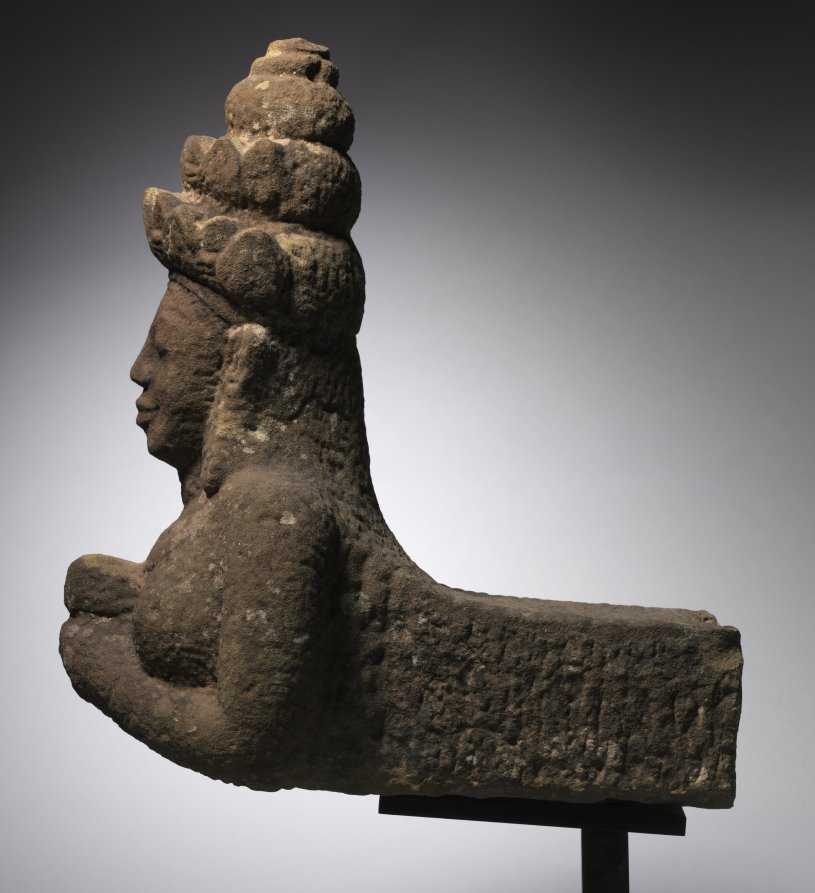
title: Apsara Bracket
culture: Vietnam (Champa)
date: 900s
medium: Sandstone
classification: Sculpture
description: This celestial being is a resident of heaven, ornamented as a goddess with tiered crown, heavy earrings, and broad necklace. She reverently proffers an offering, possibly a lotus bud. This figure would have been part of the embellishment of a Cham temple. Her bust emerges from an architectural element that may have formed the end of a balustrade or ceiling bracket.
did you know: The light-colored spots are due to lichen and other organic growths that have hardened over time, the result of outdoor weathering.